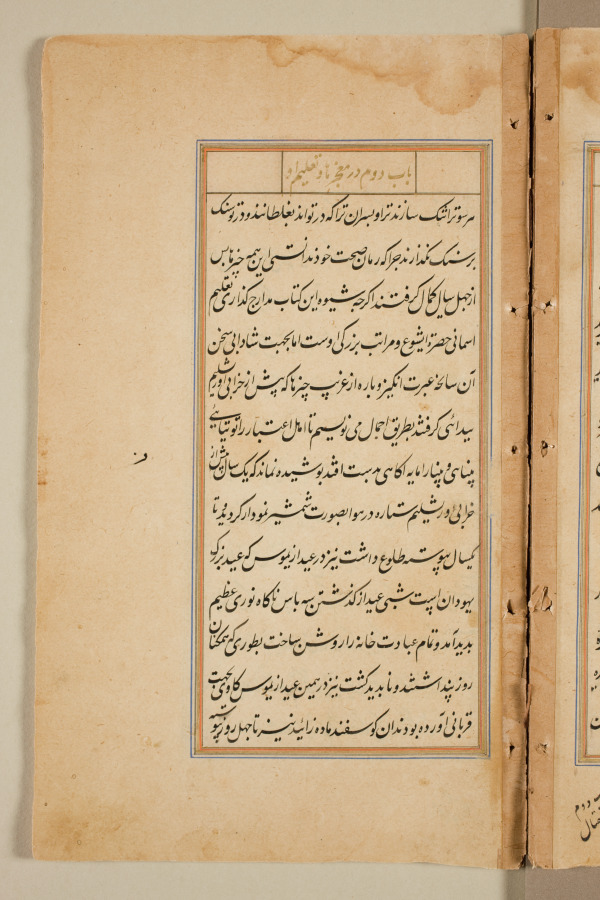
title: Text page from a Mirror of Holiness (Mir’at al-quds) of Father Jerome Xavier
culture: Mughal India, Allahabad, made for Prince Salim (1569–1627)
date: 1602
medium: Ink and gold on paper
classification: Manuscript